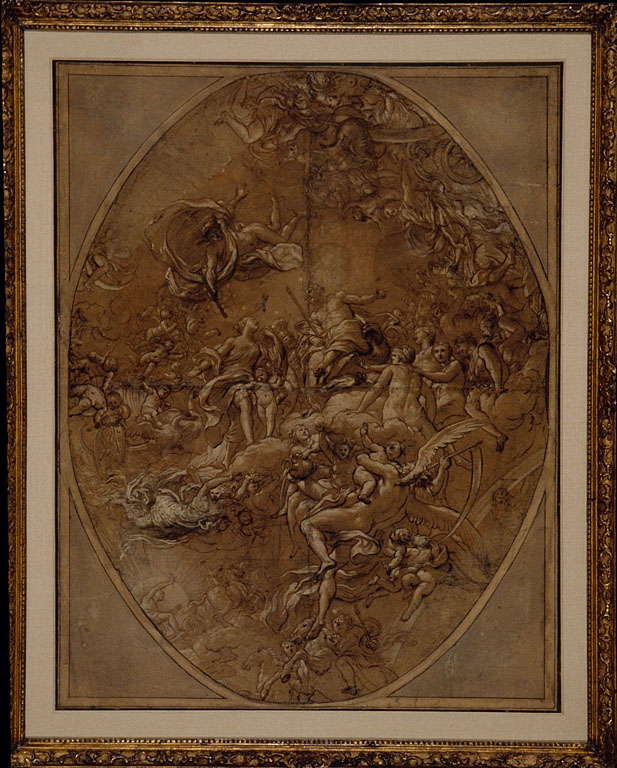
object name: Drawing and Watercolor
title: Olympus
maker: Lorenzo de' Ferrari; Italian, 1680-1744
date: 1743/1744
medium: Brush and brown ink and brown wash, heightened with white gouache, over graphite, on tan laid paper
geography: Italy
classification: pen and ink drawings; drawings (visual works); prints and drawing